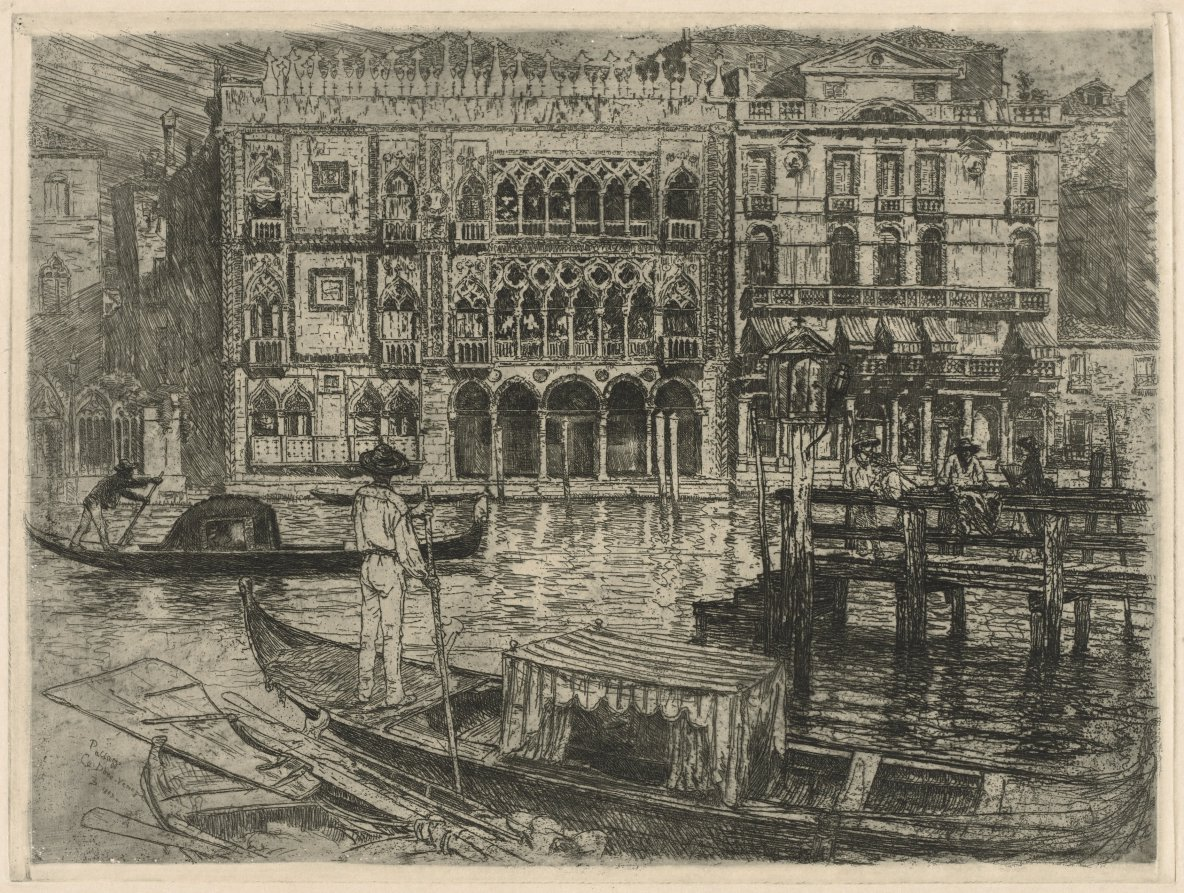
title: Palazzo ca d'Oro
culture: America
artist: Frank Duveneck (American, 1848–1919)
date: 1883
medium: etching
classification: Print